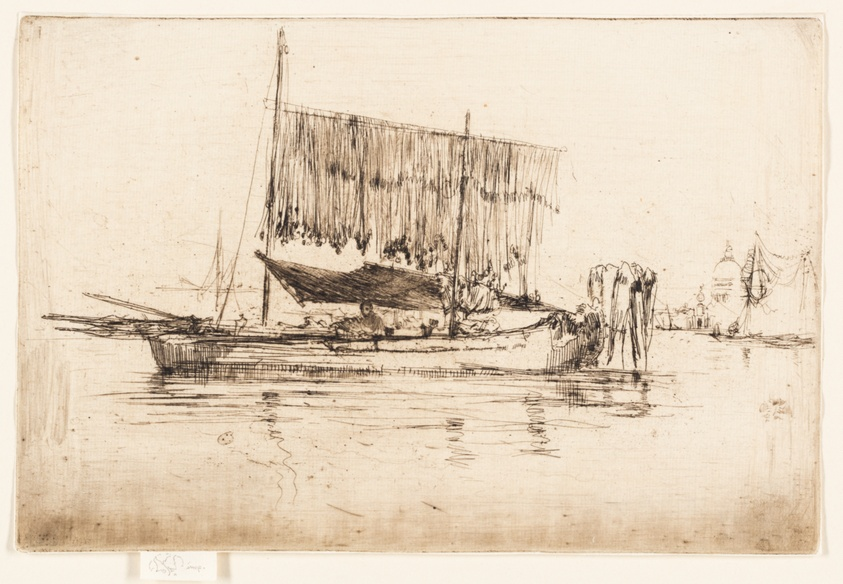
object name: Print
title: The Fishing Boat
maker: James McNeill Whistler (American, 1834-1903)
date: 1879/80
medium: Etching and drypoint with foul biting in black ink on off-white laid paper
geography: United States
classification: etching; foul biting; print; prints and drawing; drypoint; paper